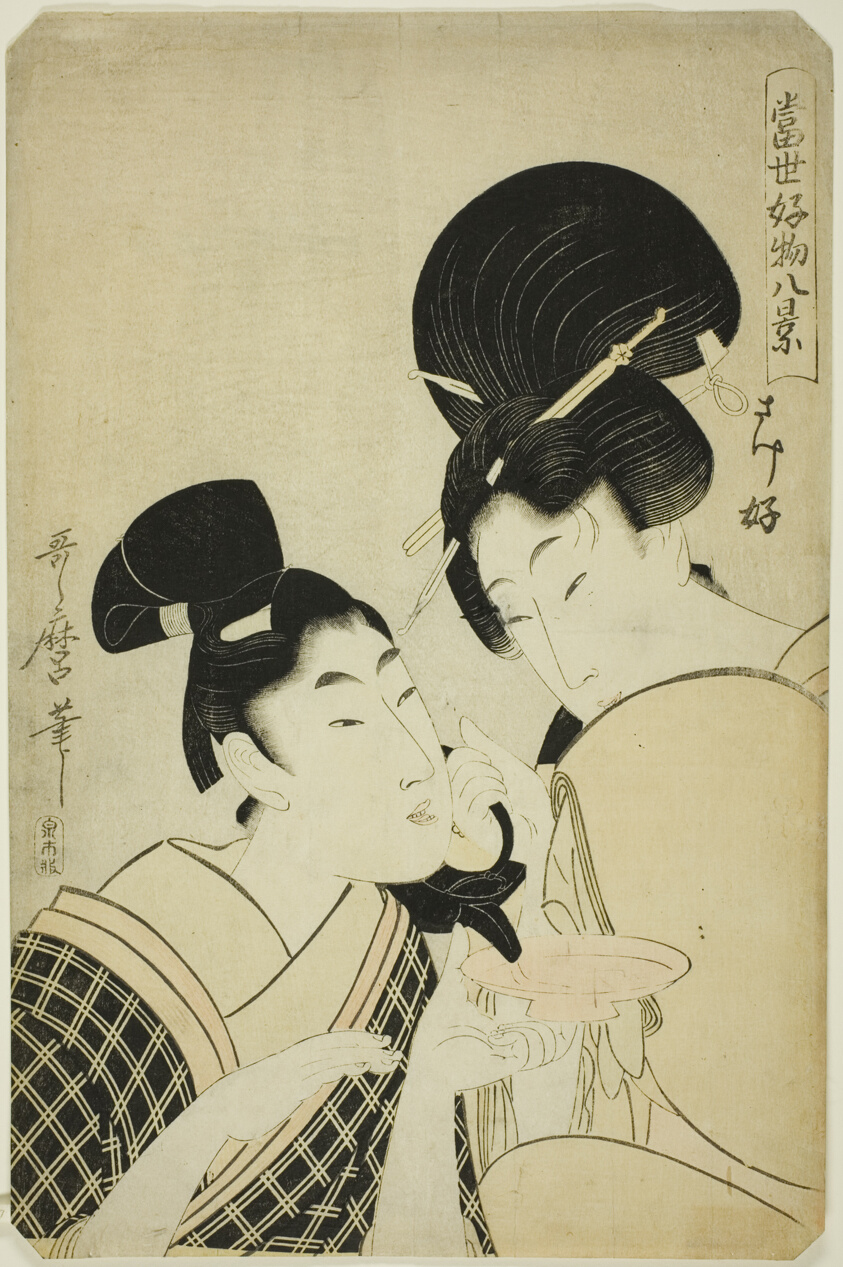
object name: Print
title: Fond of Sake (Sakezuki), from the series "Eight Views of Favorite Things of Today (Tosei kobutsu hakkei)"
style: Japanese (culture or style)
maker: Kitagawa Utamaro 喜多川 歌麿; Japanese, 1753 (?)-1806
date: c. 1801/02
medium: Color woodblock print; oban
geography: Japan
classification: print; asian art